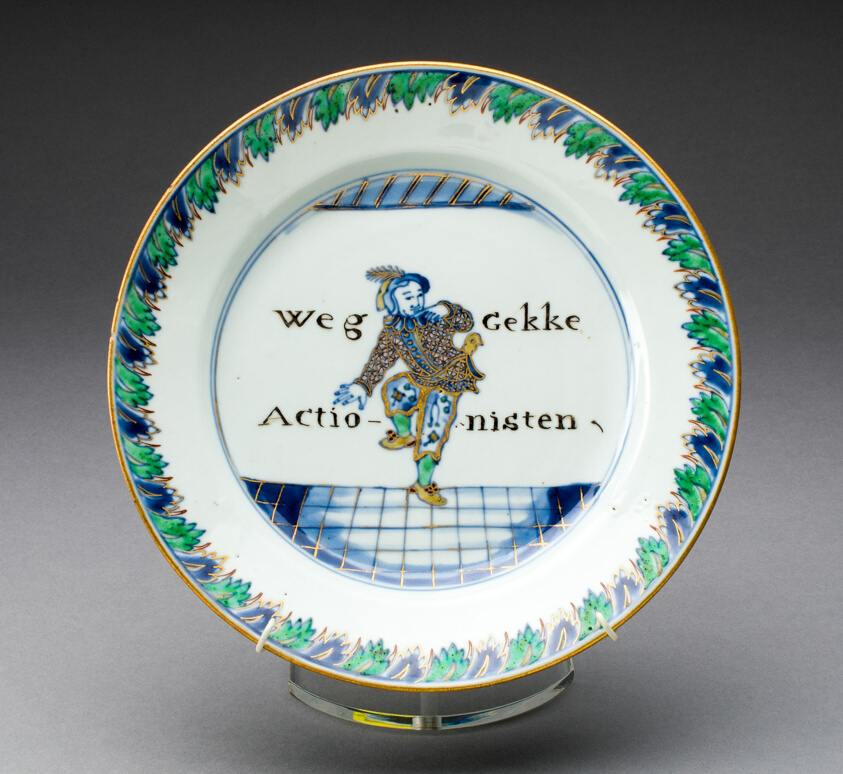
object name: Ceramics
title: Plate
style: chinese export, Chinese (culture or style), East Asian, asian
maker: China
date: c. 1721/25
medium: Hard-paste porcelain with polychrome enamels and gilding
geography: Jingdezhen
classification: plate (general, dish); dish (vessel); chinese export porcelain; porcelain; european decorative arts; ceramics